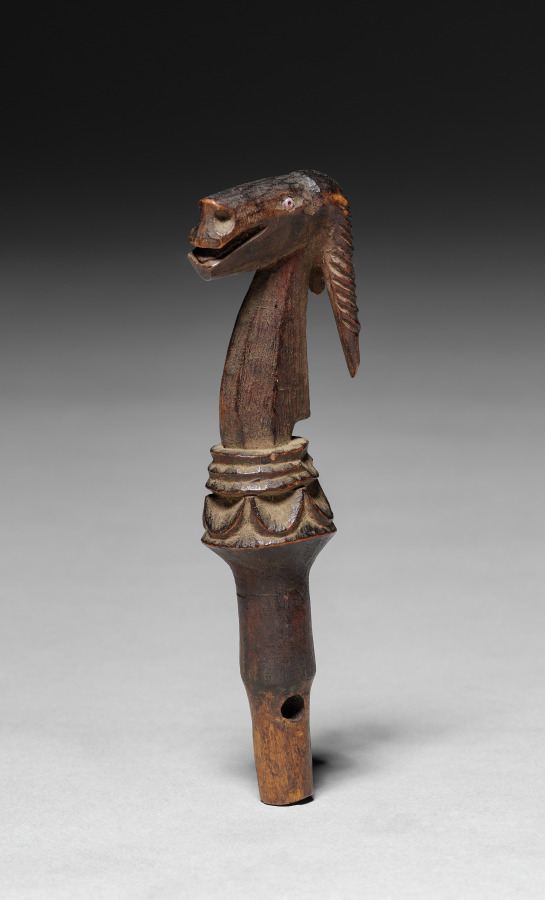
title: Peg (msuruaki) for a Sandal (mtalawanda / mtawanda) or Clog (kiatu cha mti)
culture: Africa, Central Africa, Democratic Republic of Congo, unidentified carver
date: c 1800s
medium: Wood and glass beads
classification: Wood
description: Common in the Indian Ocean region, wooden sandals changed meaning across place and time. This pair’s base elevates the foot as the toes grip an antelope-shaped peg (msuruaki). Crisp geometric sole designs suggest they were rarely worn. East African elites and merchants once had exclusive rights to wooden shoes, wearing elaborate ones only for portraits. Formerly enslaved people living along the coast wore simpler ones from the 1840s onward, adopting elite footwear to assert their liberation. However, slave traders like the Zanzibari “Tippu Tip” (c. 1832–1905) likely brought mitalawanda to Central Africa; stylistic elements of this pair hail from that region.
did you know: This distinctive footwear traveled from Southeast Asia and the Middle East to Africa, first to the Swahili Coast and then further inland to parts of Central Africa. The deity Krishna wears similar shoes (paduka) in an eighteenth-century Indian miniature painting (2003.344).